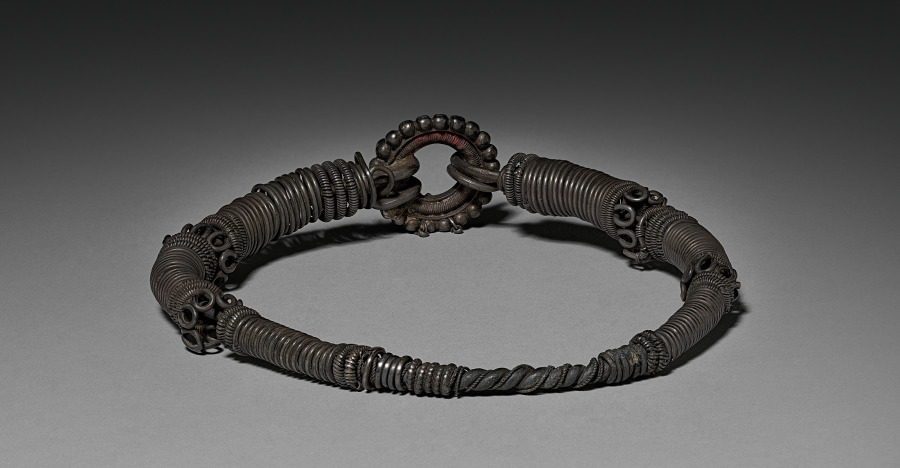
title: Necklet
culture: Burma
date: 1800s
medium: silver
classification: Jewelry